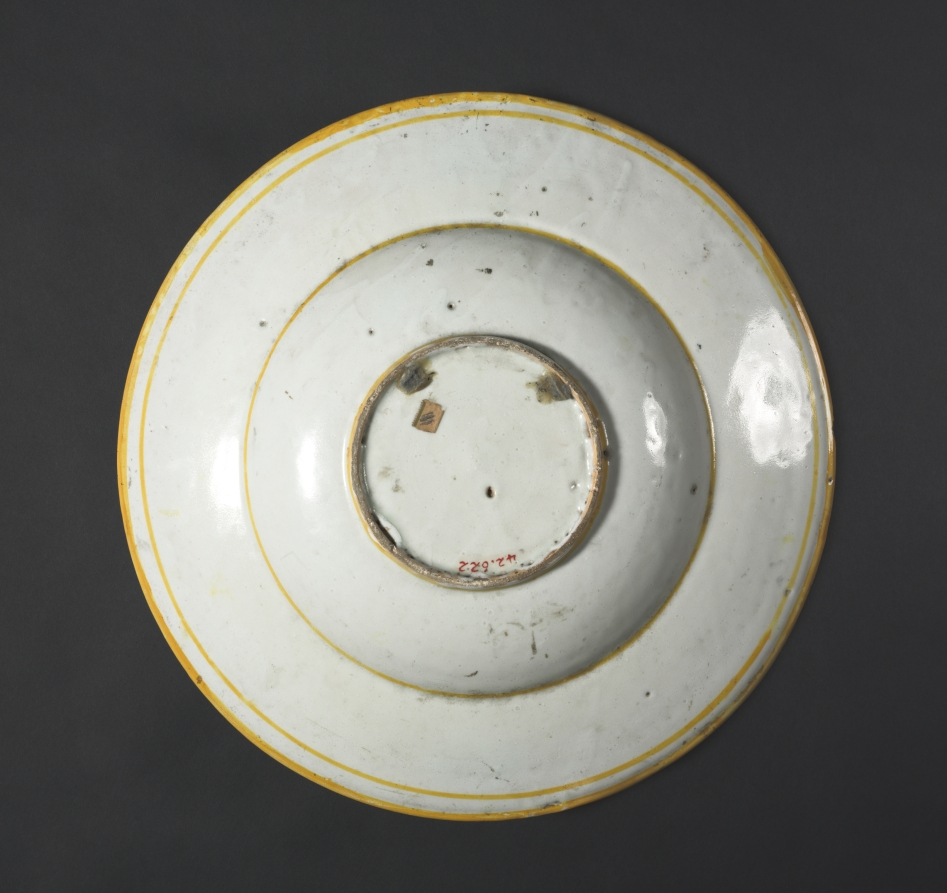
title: Charger Depicting a Chariot Race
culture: Italy, Urbino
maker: circle of Fontana Family (Italian)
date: c. 1575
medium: tin-glazed earthenware (maiolica)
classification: Ceramic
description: During the Renaissance, an understanding of classical antiquity was perceived to be a sign of social, intellectual, and economic distinction. Scenes from Greco-Roman mythology were prominently featured on maiolica, covering the surface in a style called istoriato (decorated with stories).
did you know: The creatures along the rim of this plate are loosely based on the figures discovered on the walls of Roman ruins a century before.